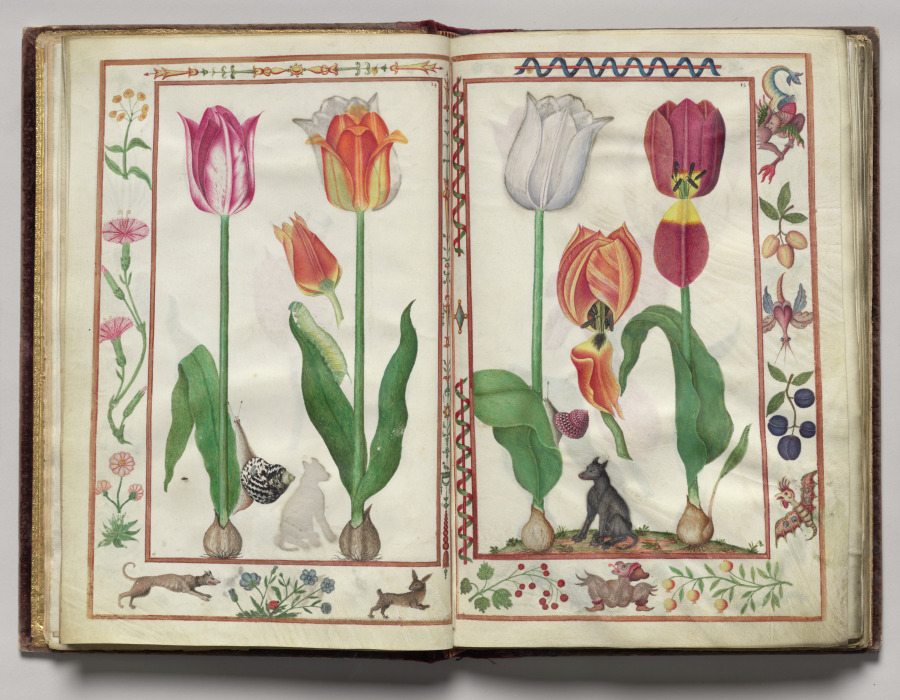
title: Tulips and Snail with Dog and Hare Border, folio 7 (verso), from Florilegium (A Book of Flower Studies)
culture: France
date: 1608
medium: watercolor, ink, silver, and gold over occasional traces of pencil, on vellum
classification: Bound Volume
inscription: Dated: Poitiers 1608 (on frontispiece) Signed: On frontispiece in black ink, lower right: Van Kuyk Notation on drawing: Frontispiece: in pencil, lower margin: * élève de Van Kessel, peintre flammand (* in pencil also appears in front of Van Kuyk's name).